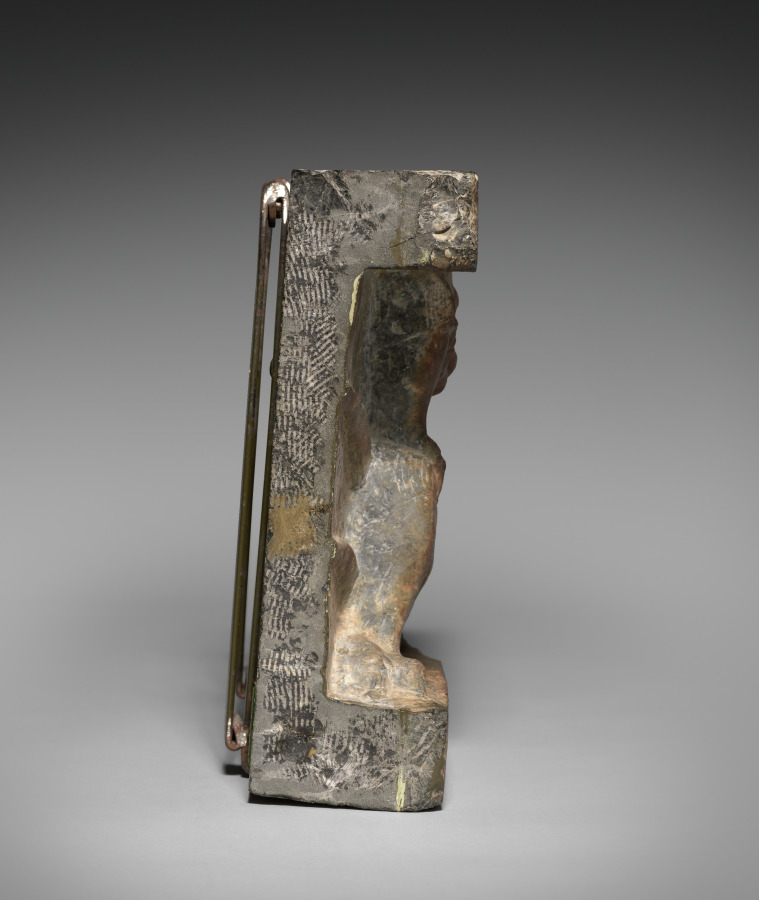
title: Monster Caryatid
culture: China, possibly from Xiangtangshan, Northern Qi dynasty (550–577)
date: late 500s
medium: Limestone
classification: Sculpture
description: This squatting monster with claws on its knees, braces its shoulders against an overhanging molding. The half-human, half-animal creature was likely part of a Buddhist cave-temple complex at Xiangtangshan, in Hebei Province, northwest China. Found in the lower registers of stone monuments of either architectural structures or statues of Buddhist deities, such monsters had a supportive function. Their scary appearance was believed to keep evil spirits away from the sacred sites.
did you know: The complex of Buddhist cave temples at Xiangtangshan, “Mountain of Echoing Halls,” is a central achievement of the Northern Qi period.